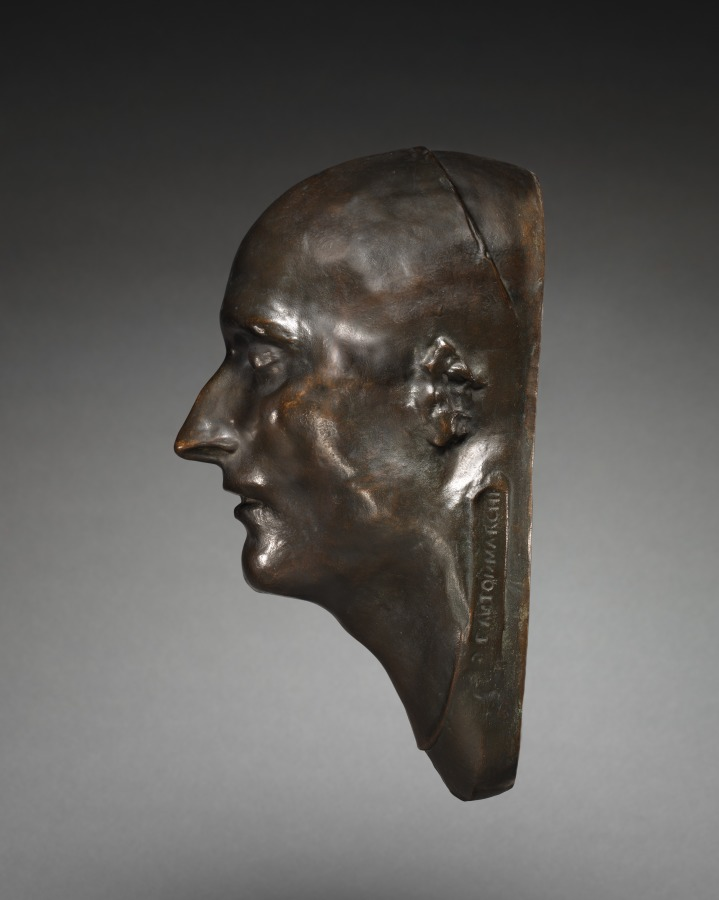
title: Mask of Napoleon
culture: Italy, 19th century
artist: C. Francesco Antommarchi (Italian, 1780–1838)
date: early 19th century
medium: bronze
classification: Sculpture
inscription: Signed on one side, inscribed on the other: "A Loie Fuller. E. Rudier, fondeur"